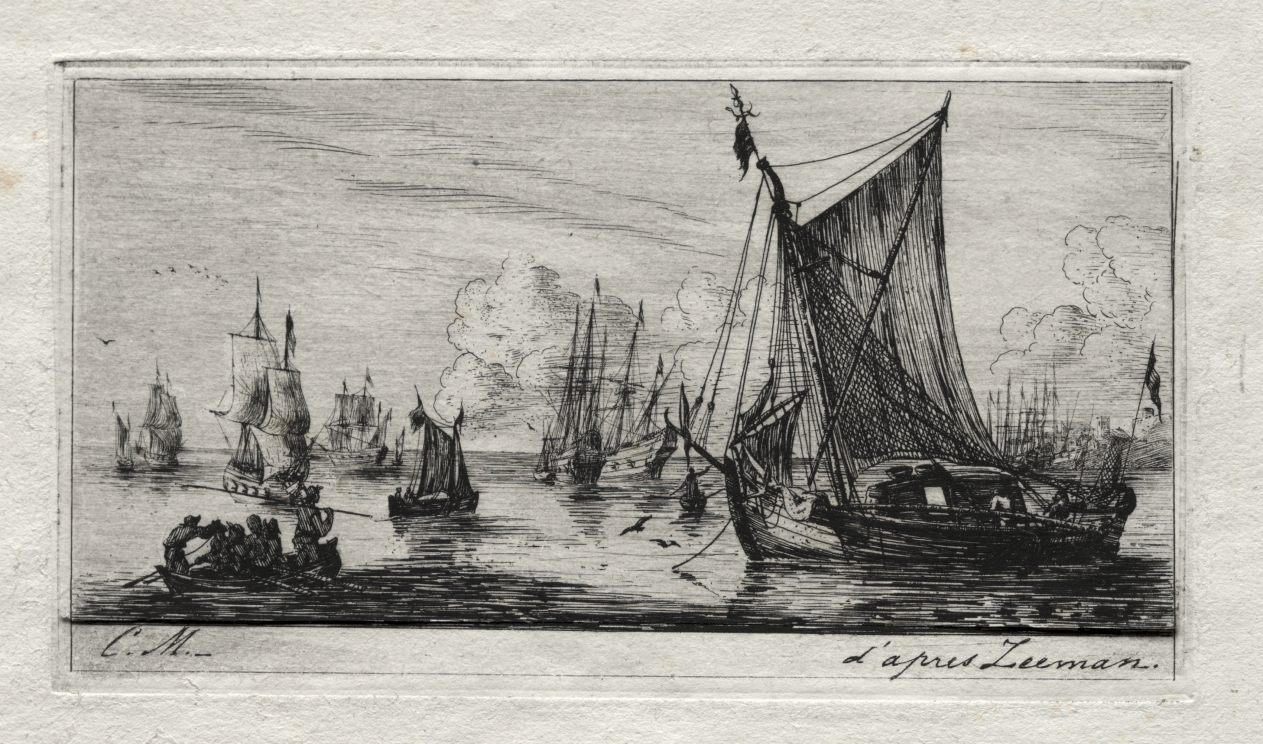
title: South Sea Fishers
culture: France, 19th century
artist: Charles Meryon (French, 1821–1868)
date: 1850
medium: etching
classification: Print